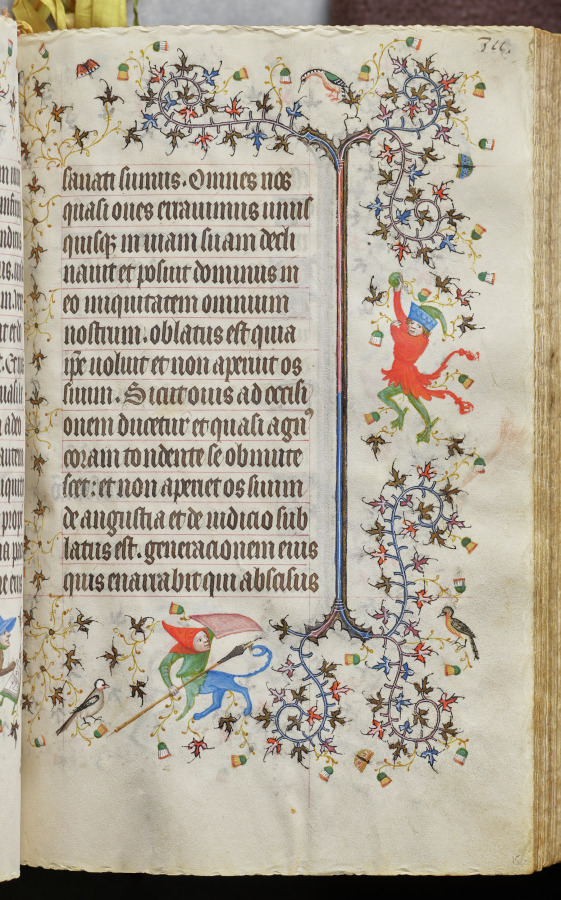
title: Hours of Charles the Noble, King of Navarre (1361-1425): fol. 156r, Text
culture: France, Paris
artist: Master of the Brussels Initials and Associates (French)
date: c. 1405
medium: ink, tempera, and gold on vellum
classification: Bound Volume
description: This precious volume was obviously highly prized by its owner, the French-born King of Navarre, who had his coat of arms painted on no less than twenty folios. Rather than directly commissioning this manuscript from a specific workshop, it seems that Charles the Noble acquired his book of hours -- perhaps ready-made for the luxury market -- while on a trip to Paris in 1404-05. A collaborative effort, six painting styles are evidenced within the pages of this codex, those of two Italians, two Frenchmen, and two Netherlanders. The painter who was responsible for the planning and decoration of the book, and who produced seventeen of the large miniatures, was a Bolognese artist known as the Master of the Brussels Initials. His principal assistant, responsible for most of the borders, was a Florentine who signed his name "Zecho" da Firenze on folio 208 verso.